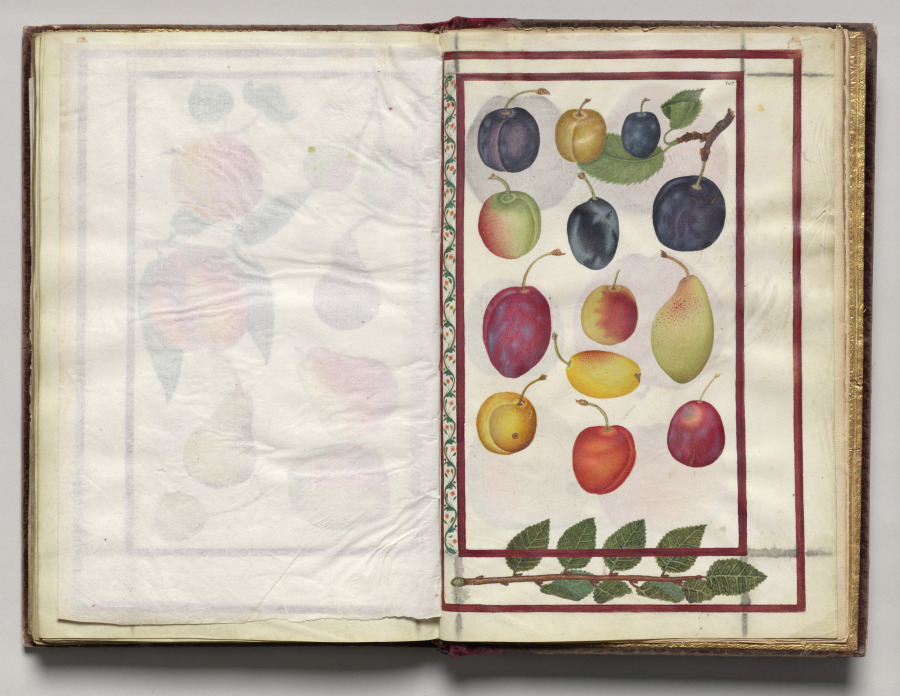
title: Plums with Branch Border, folio 48 (recto), from Florilegium (A Book of Flower Studies)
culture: France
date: 1608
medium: watercolor, ink, silver, and gold over occasional traces of pencil, on vellum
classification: Bound Volume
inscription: Dated: Poitiers 1608 (on frontispiece) Signed: On frontispiece in black ink, lower right: Van Kuyk Notation on drawing: Frontispiece: in pencil, lower margin: * élève de Van Kessel, peintre flammand (* in pencil also appears in front of Van Kuyk's name).